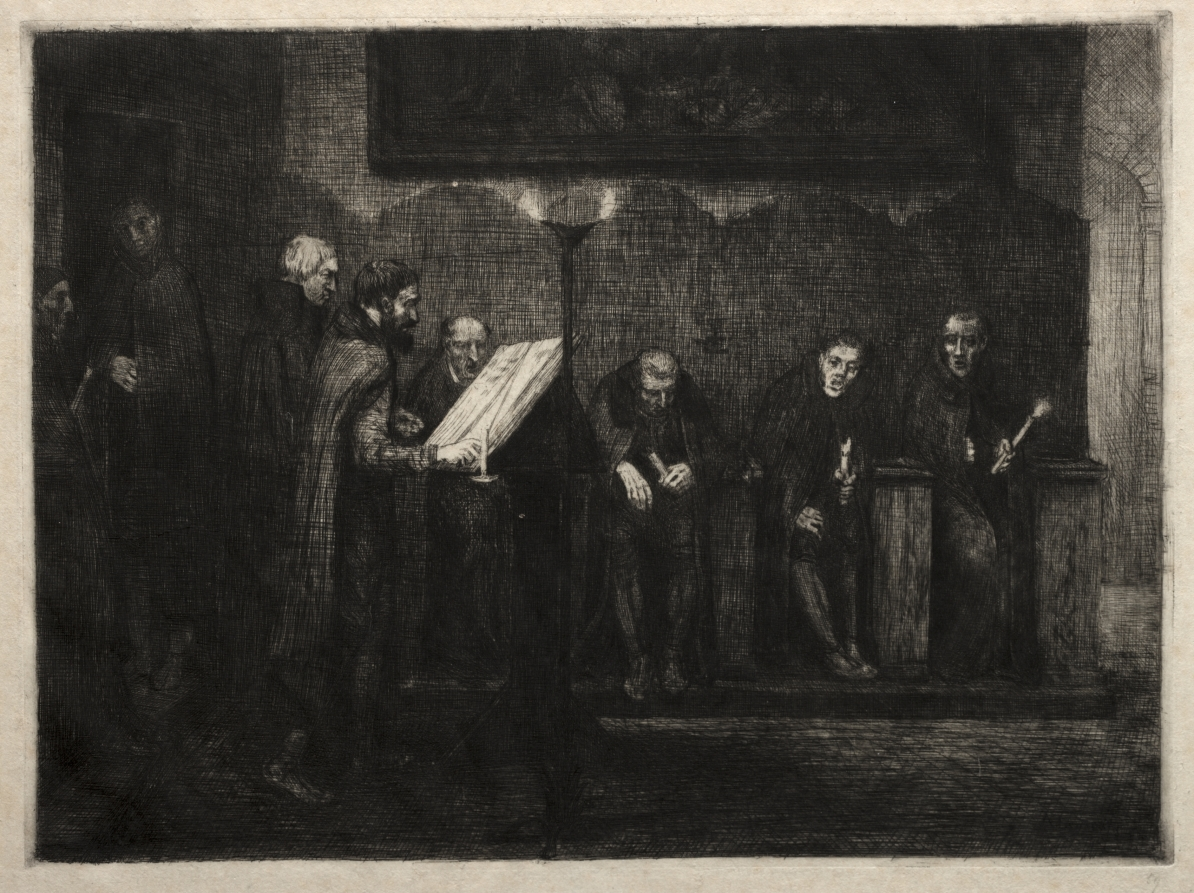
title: The Spanish Singers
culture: France, 19th century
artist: Alphonse Legros (French, 1837–1911)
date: c. 1857–1911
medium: etching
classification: Print